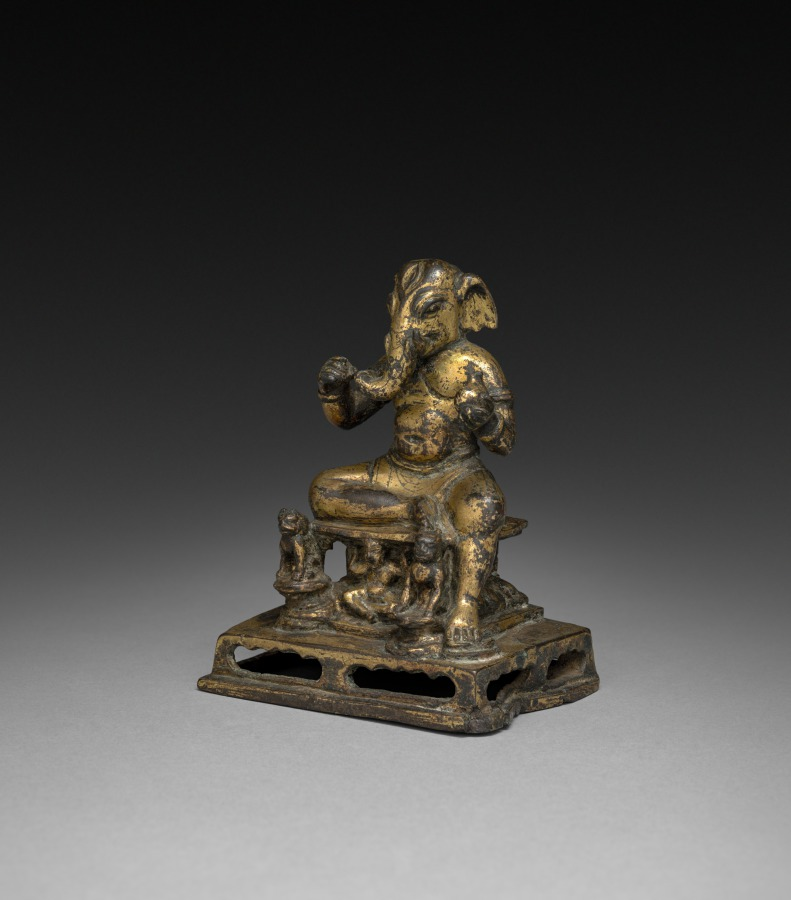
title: Ganesha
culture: China, Tang dynasty (618-907)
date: 618–907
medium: gilt bronze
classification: Sculpture